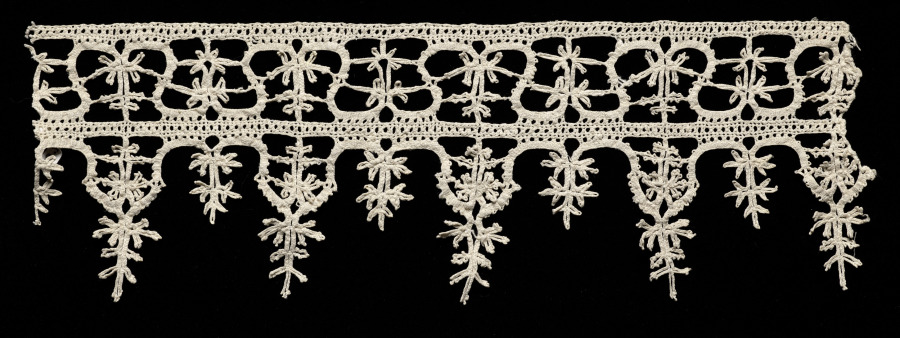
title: Lace Insertion and Edging of Points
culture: Italy, Venice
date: 1600–1640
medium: Bobbin lace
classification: Lace